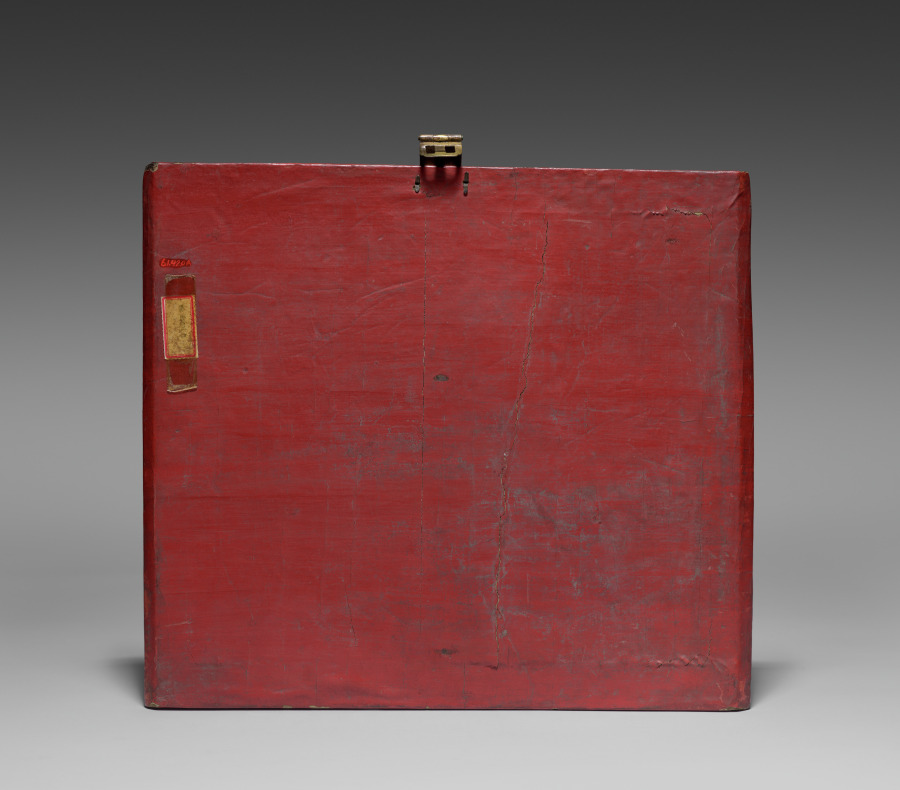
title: Cover Panel for a Tihong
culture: China, Ming dynasty (1368-1644), Wanli reign (1572-1620)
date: 1585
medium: carved cinnabar lacquer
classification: Lacquer